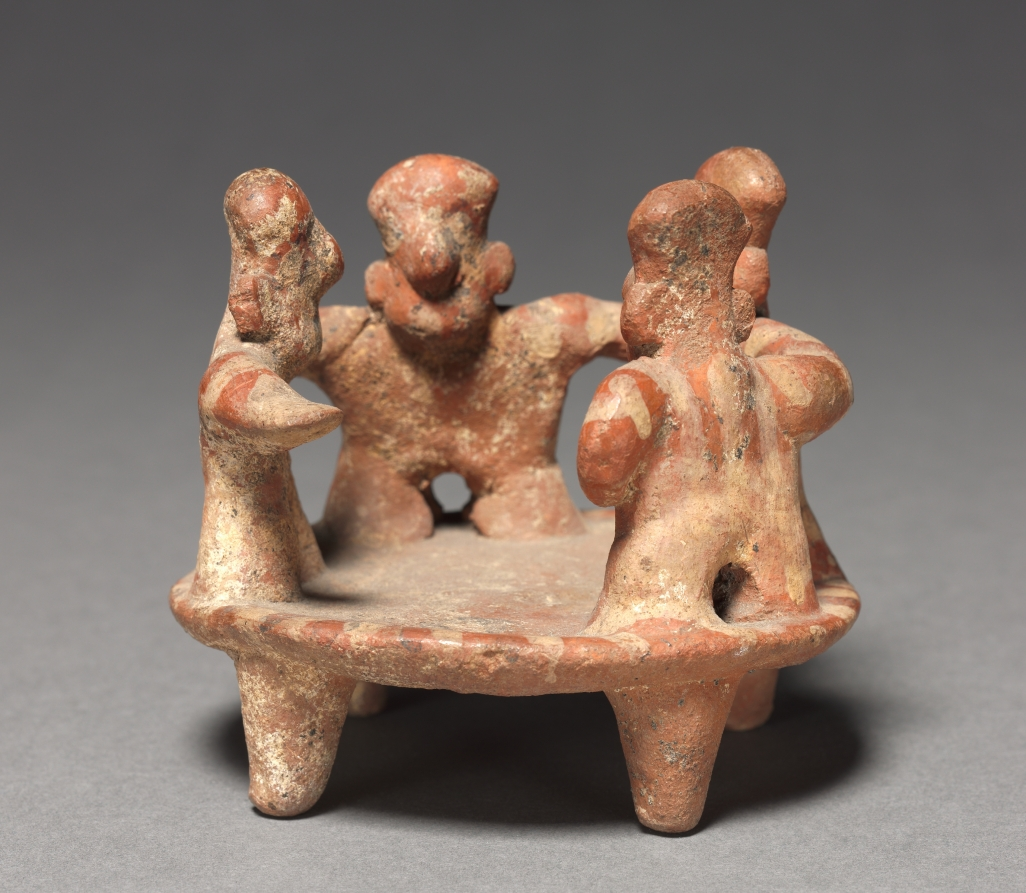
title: Dancing Group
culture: Mexico, Western Nyarit, 5th-6th Century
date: 400s-500s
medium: terracotta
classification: Sculpture